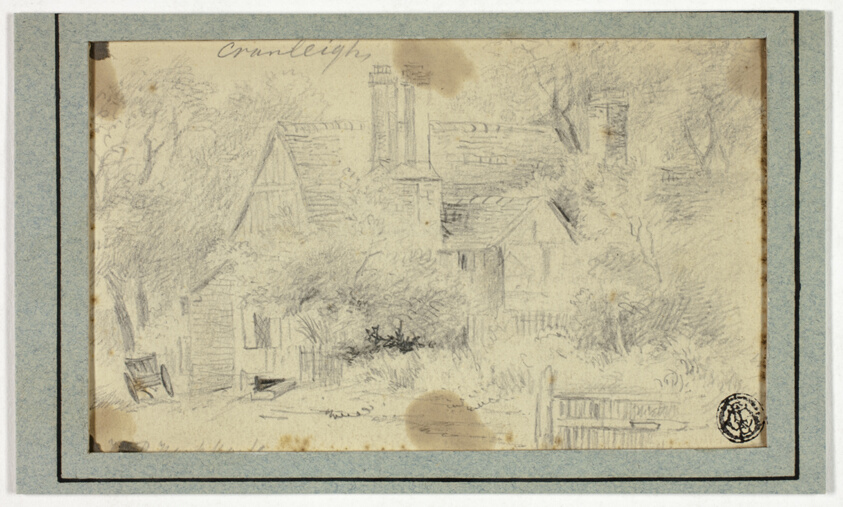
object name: Drawing and Watercolor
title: Cranleigh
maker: Hendrik Pieter Koekkoek (Dutch, 1843-c. 1890)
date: c. 1877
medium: Graphite on cream wove paper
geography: Holland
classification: graphite; drawings (visual works); prints and drawing